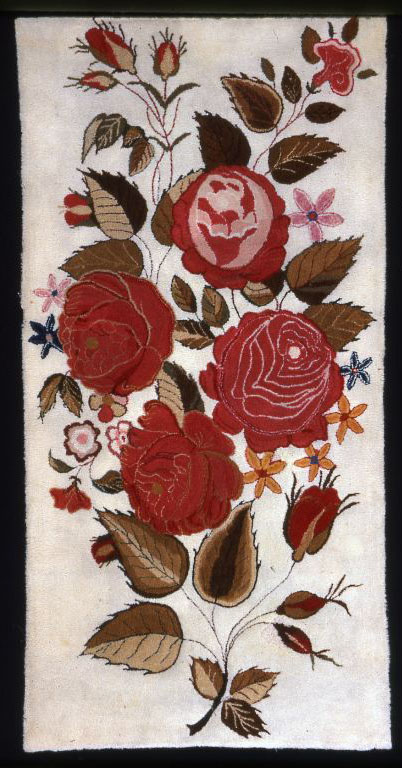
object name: Textile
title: Rug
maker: United States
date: late 18th/early 19th century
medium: Cotton, plain weave with wool yarn forming "hooked" pile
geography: United States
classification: textile; needlework - rug; needlework (visual works)